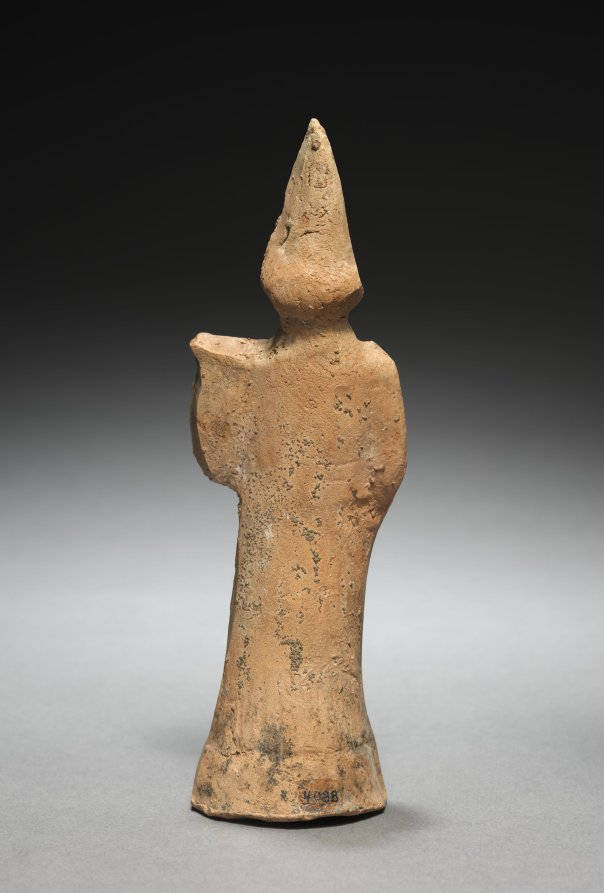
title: Draped Figure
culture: Parthian Empire (247 BCE–224 CE)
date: 1–200 CE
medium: terracotta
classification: Sculpture